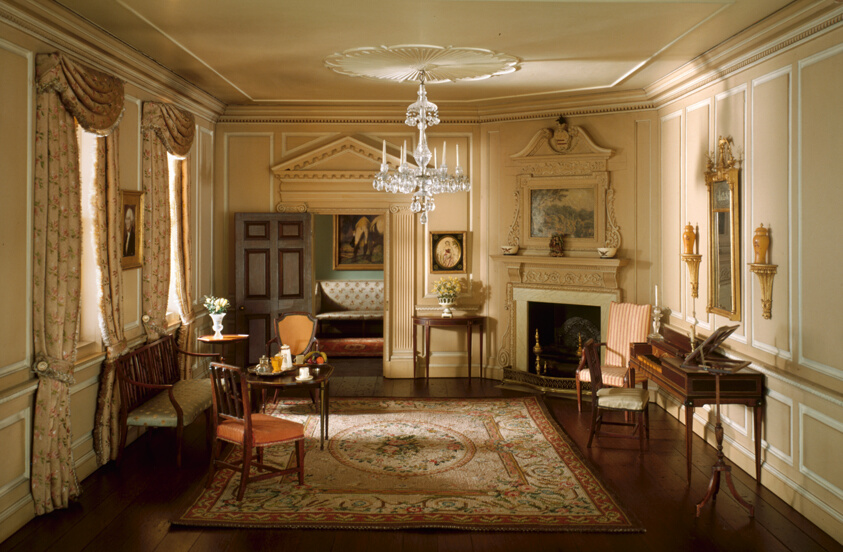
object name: Miniature room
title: A21: Virginia Parlor, 1758-87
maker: Designed by Narcissa Niblack Thorne; American, 1882-1966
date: c. 1940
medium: Miniature room, mixed media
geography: United States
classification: miniature; thorne rooms